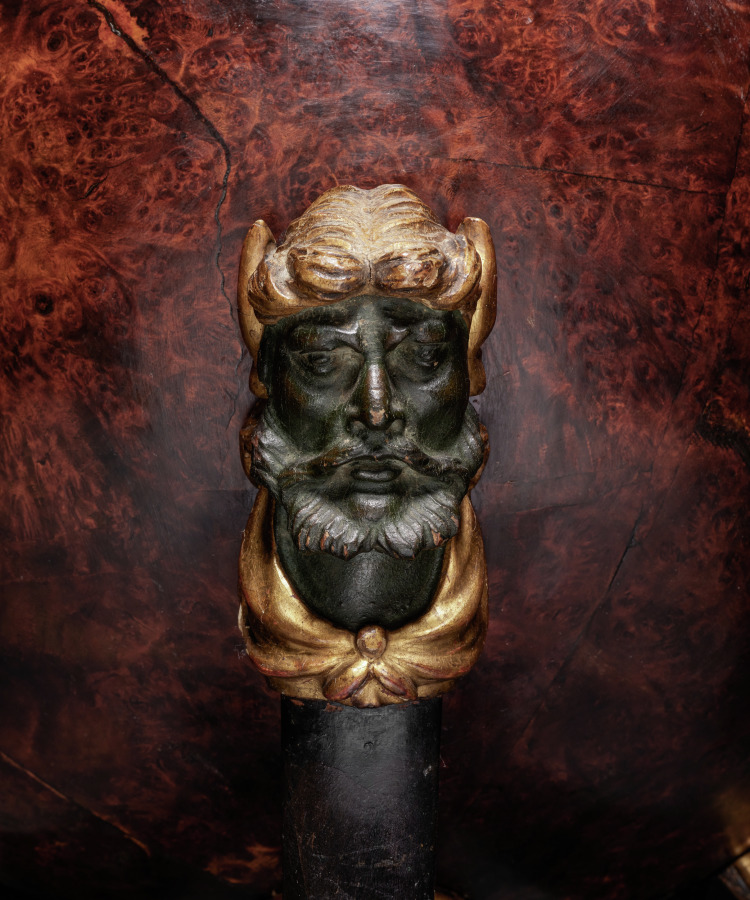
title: Globe Work Table (Globustisch)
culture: Austria, Vienna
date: c. 1810–15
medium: Burl walnut veneer, mahogany, ebony, satinwood, gilt wood, painted wood; mirrored glass; metal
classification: Furniture and woodwork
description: Work tables resembling globes were the usual form for a lady's sewing or writing table around 1800 in Austria. Combining moving parts, secret compartments, and highly finished decoration, these tables were also a way for the cabinetmaker to show off his skill. The tripod supports and temple-like architectural quality of both the exterior and interior decoration reflect the fashionable taste for neoclassical style, or Biedermeier as it was called in Austria, where Vienna was the center of such elaborate furniture production.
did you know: The top half of the globe rotates upward to reveal hidden compartments for sewing tools, threads, and unfinished fabric pieces.